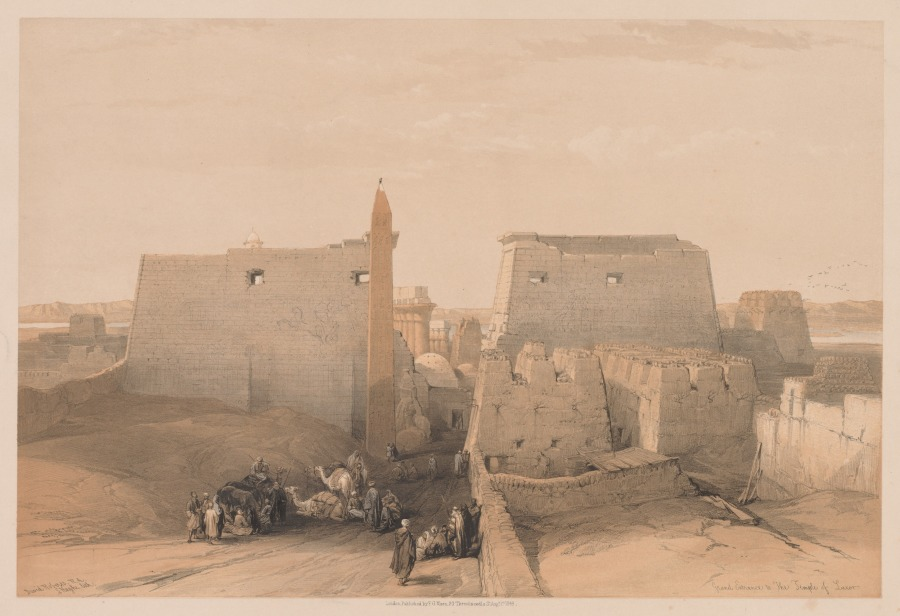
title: Egypt and Nubia: Volume II - No. 38, Grand Entrances to the Temple of Luxor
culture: England, 19th century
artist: Louis Haghe (British, 1806–1885)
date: 1838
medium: color lithograph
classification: Print